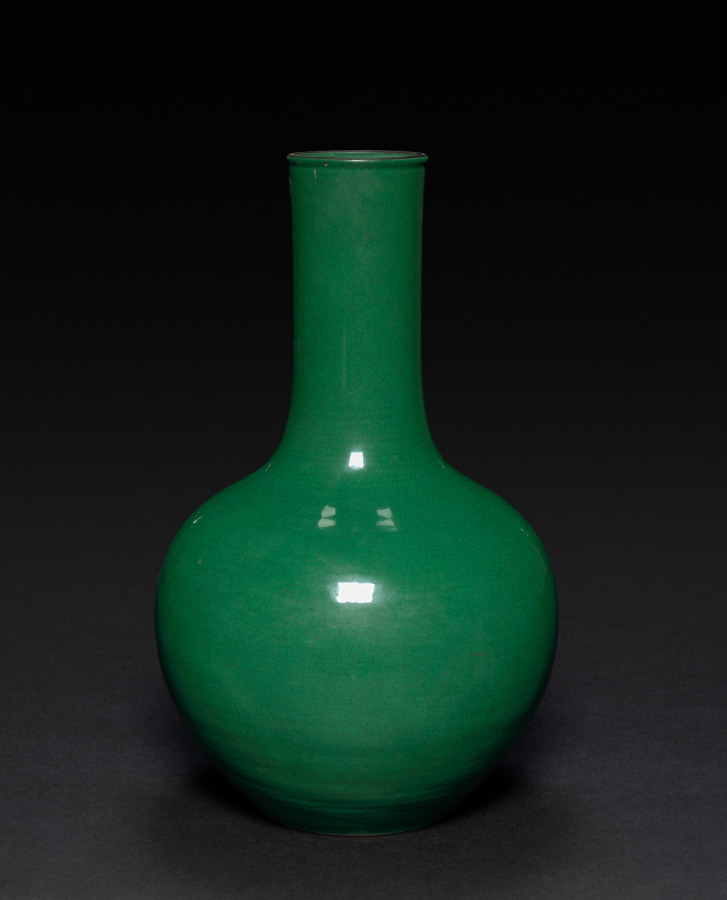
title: Bottle-shaped Vase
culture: China, Qing dynasty (1644–1911), Qianlong reign (1736–95)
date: 1736–95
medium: porcelain with green glaze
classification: Ceramic